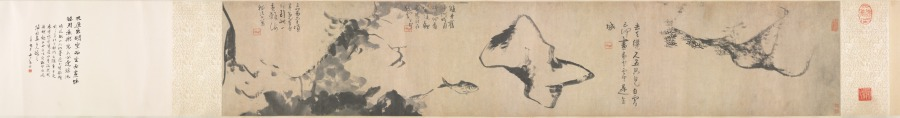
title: Fish and Rocks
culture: China, Qing dynasty (1644-1911)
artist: Bada Shanren (Chinese, 1626–1705)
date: mid- to late 1600s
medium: Handscroll; ink on paper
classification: Painting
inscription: 去天纔尺五，只見白雲行。 云何畫黃花，雲中是金城。 [印] 个山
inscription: 雙井舊中河，明月時延佇。 黃家雙鯉魚，為龍在何處。 [印] 个山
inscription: 三萬六千頃，畢竟有魚行。 到此一黃頰，海潮次上笙。 [印] 个山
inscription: 5 additional seals: 2 of Zhang Daqian 張大千 (1899–1983); 1 of Ta-an Chü-shih; 2 unidentified.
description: Bada Shanren, also called Zhu Da, a 17th-century painter who rejected conventions in favor of an individual, personal expression, is known for his unorthodox compositions of fish, flowers, birds, and rocks. Fish in his paintings are often looking upward toward heaven, swimming in a pond of undefined space. As a member of the Ming imperial family, Zhu Da lost his princely status and hid in a monastery when the Manchus, foreigners from the north, established the Qing dynasty in 1644. This scroll may have some autobiographical meaning, representing fish as leftover subjects (yimin) who lived in a void, having lost their roles in life after the fall of the dynasty.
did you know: After each poem, Bada Shanren used his so-called jixingyin seal 屐形印, which resembles the impression of a shoe on soft mud.